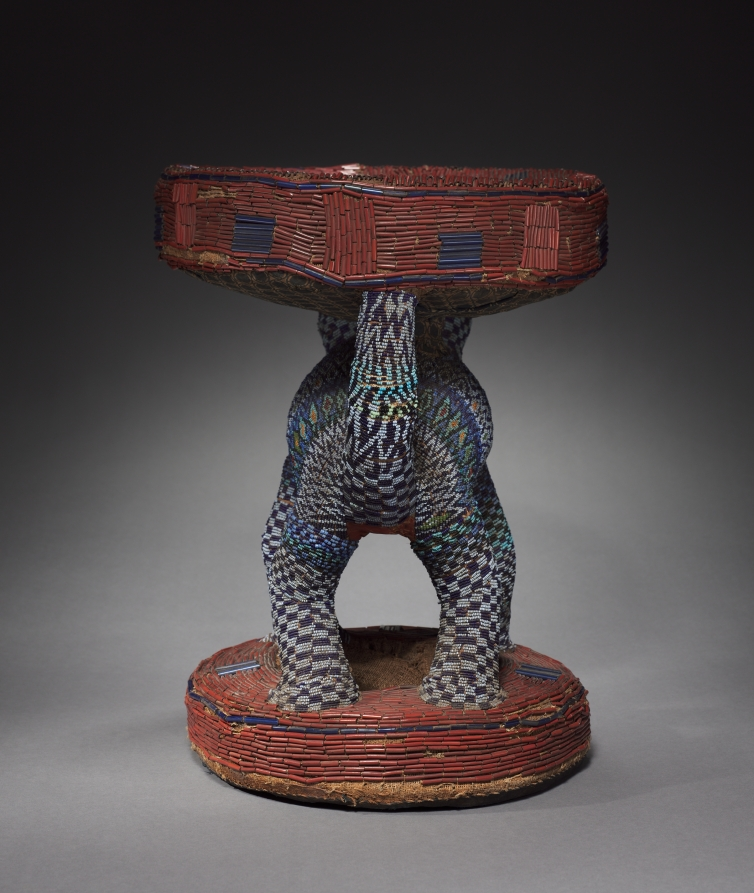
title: Prestige stool (Kuo fo)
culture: Africa, Central Africa, Cameroon, Bandjoun Kingdom, Bamileke makers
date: possibly 1800s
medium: Wood, cotton, plant fiber, glass beads, and indigo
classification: Furniture and woodwork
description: Bead-covered wooden stools and thrones are one of the most prevalent art forms among the various kingdoms and chiefdoms in the Cameroon Grassfields region. This example, once part of the royal treasury, belongs in the category of "travel stools," usually used in conjunction with more private, minor ceremonies and rituals at the palace. The leopard imagery confirms the object’s royal status. It alludes to the belief that the king could temporarily transform himself into this feared predator.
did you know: The beads on this stool were sewn on by hand. Look underneath the stool, however, and you can see commercially made printed fabric.